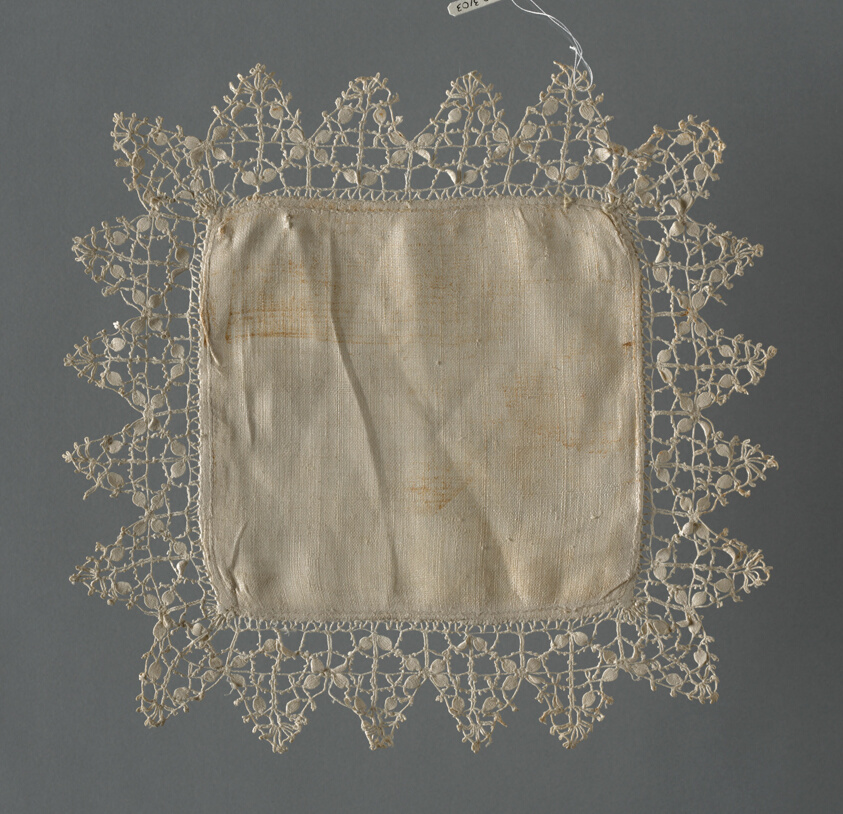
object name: Textile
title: Corporal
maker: Probably Italy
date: 1601/25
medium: Linen, plain weave; embroidered in chain and overcast stitches; edged with bobbin straight lace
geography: Italy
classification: textile; needlework (visual works)